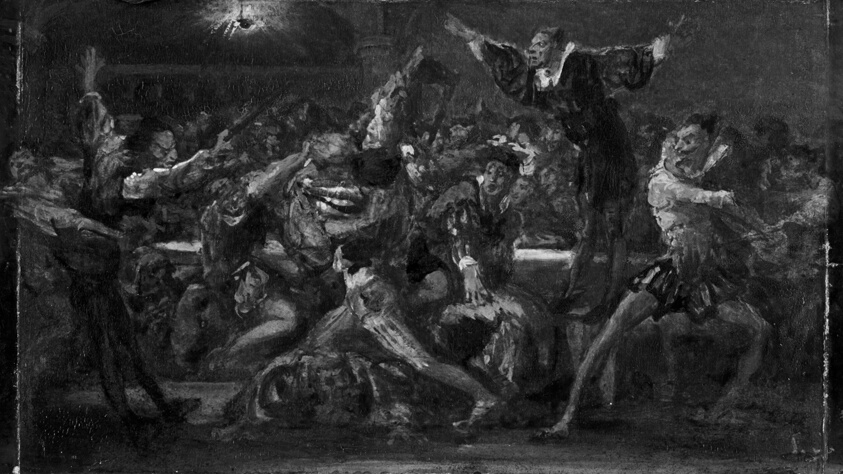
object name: Painting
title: The Carousal (Scene from Faust?)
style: 19th century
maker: Artist unknown (French, 19th century)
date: c. 1860/70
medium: Oil on panel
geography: France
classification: painting; oil on panel; paint; european painting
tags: people, literature, men, taverns, women